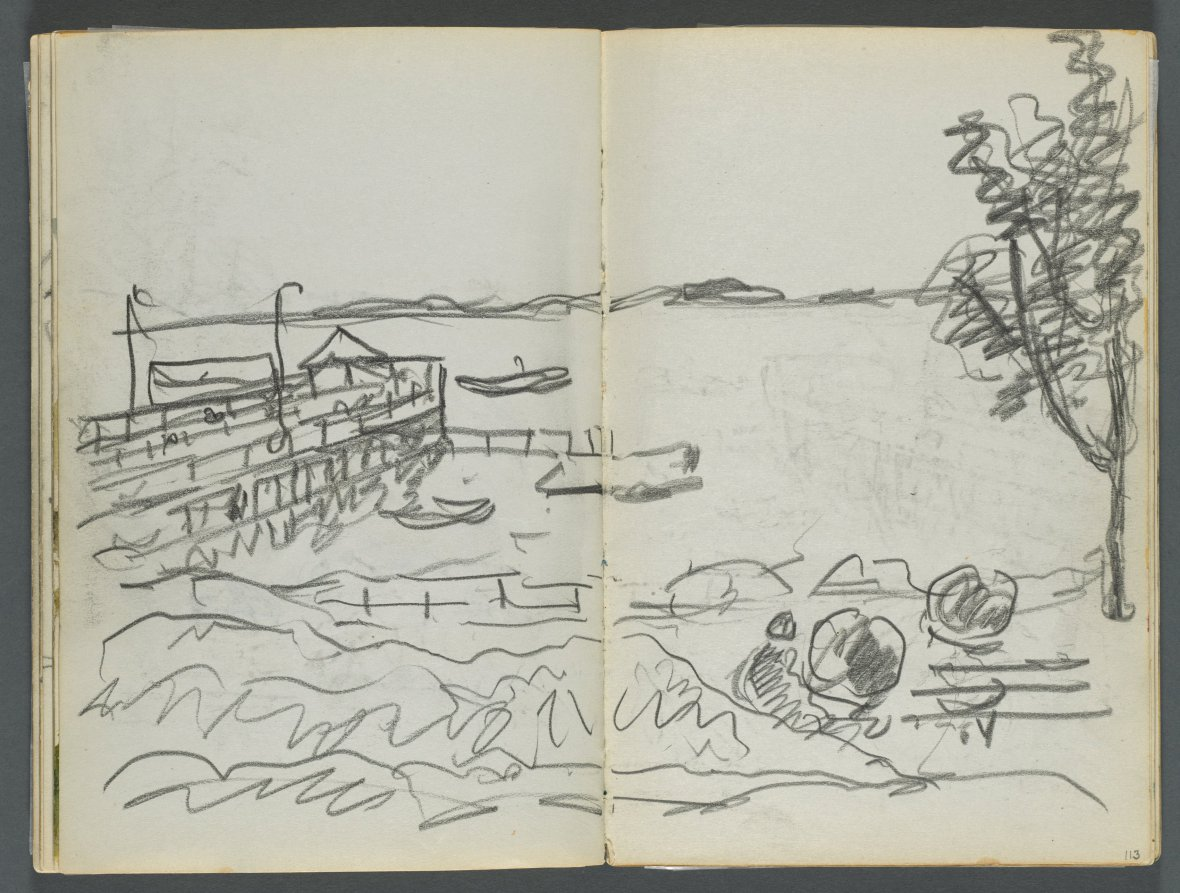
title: Sketchbook, The Dells, N° 127, page 112 & 113: View of Dock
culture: America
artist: Maurice Prendergast (American, born Newfoundland [now Canada], 1858–1924)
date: c. 1919–1921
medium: graphite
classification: Bound Volume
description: This sketchbook contains 59 pages of graphite drawings and 16 watercolors made at various locations on Cape Ann, Massachusetts.